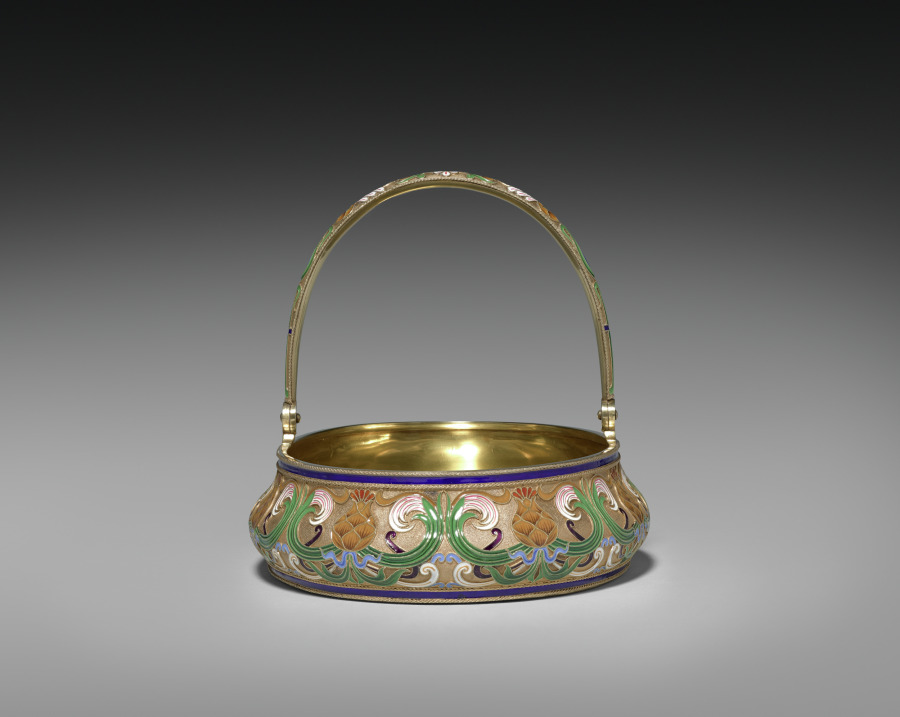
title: Cake Basket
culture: Russia, St. Petersburg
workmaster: attributed to Feodor Ivanovich Rückert (Russian, 1840–1917)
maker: House of Fabergé (Russian, 1842–1918)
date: 1887–96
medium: silver gilt, opaque cloisonné enamel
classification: Miscellaneous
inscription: 88, St. George [assay mark for Moscow, 1882-1896]; C. Fabergé (in Cyrillic); double-headed eagle [imperial warrant]; 10593 scratched.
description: Fabergé’s craftsmen in Moscow, especially under the watchful eye of workmaster Feodor Rückert, became known for their work in the Pan-Slavic or Neo-Russian style, hearkening back to 17th-century motifs of Russian folk art. Often on rather conventional shapes, Rückert and his silversmiths created an explosion of color, achieved through the historic technique of cloisonné enamel in which tiny metal lines are soldered to the surface then filled with glass powders in various colors and fired to create a high gloss finish. The result is a spectacular evocation of the 17th-century originals. Far from mere copies, however, Rückert's designs, such as this tea service, employ naturalistic or abstract motifs in a thoroughly modern adaptation of a remarkable earlier period of Russian art and decoration.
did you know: This cake basket is part of a larger tea service.